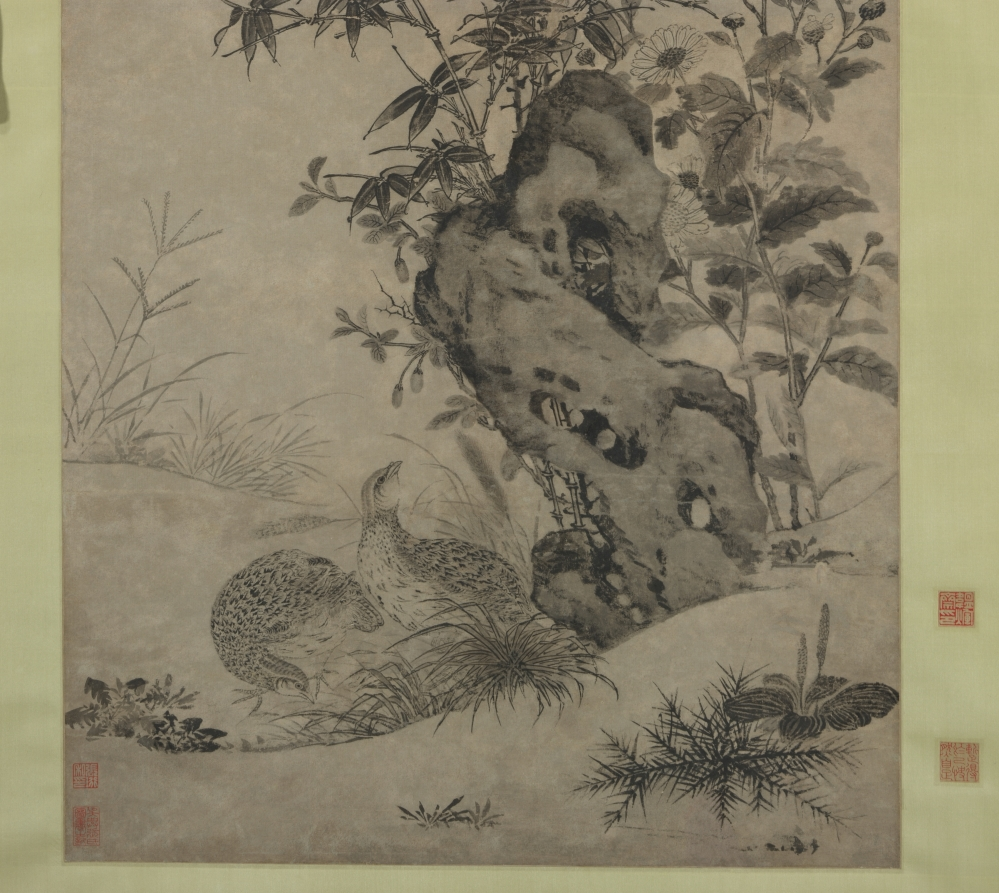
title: Quails and Sparrows in an Autumn Scene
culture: China, Yuan dynasty (1271-1368)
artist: Wang Yuan (Chinese, c. 1299-after 1366)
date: 1347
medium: hanging scroll, ink on paper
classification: Painting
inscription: 至正丁亥春 錢塘王淵若水寫秋景鶉雀圖 [印] 澹轩; [印] 若水; [印] 墨妙筆精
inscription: 翦翦輕風搖翠葆，團團清露滴金叢。 劍南畫手今何在，冷落賓榔枸杞新。 鐵篴 [印] 杨维桢印; [印] 廉夫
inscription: 1 inscription and 10 seals of the Qianlong emperor (r. 1736-95)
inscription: 4 seals of Zhang Heng 張珩 (1915-1963)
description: The flower-and-bird subjects here are depicted in a meticulous manner, echoing the academic tradition but translating the customarily colored images to plain monochrome. Fine ink lines combined with carefully graded washes define the contours and give subtle modeling to the natural forms. Wang Yuan excelled in flower-and-bird subjects as well as landscape and figure paintings. A child prodigy, he was instructed by the great Yuan master Zhao Mengfu at an early age.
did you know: Wang Yuan was from Qiantang, today’s Hangzhou in eastern China.